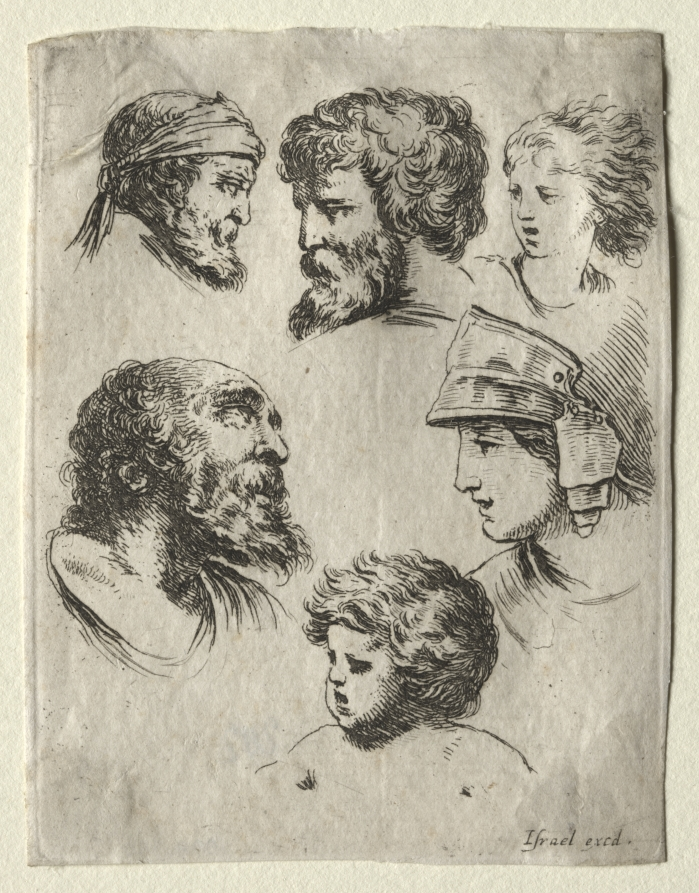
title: Book for Learning to Draw (Livre pour apprendre à dessiner): Six Portrait Heads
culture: Italy, 17th century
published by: Israël Henriet (French, c. 1590–1661)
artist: Stefano Della Bella (Italian, 1610–1664)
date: 1649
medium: etching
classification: Print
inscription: inscribed in plate: Israel excd. (1.r.)